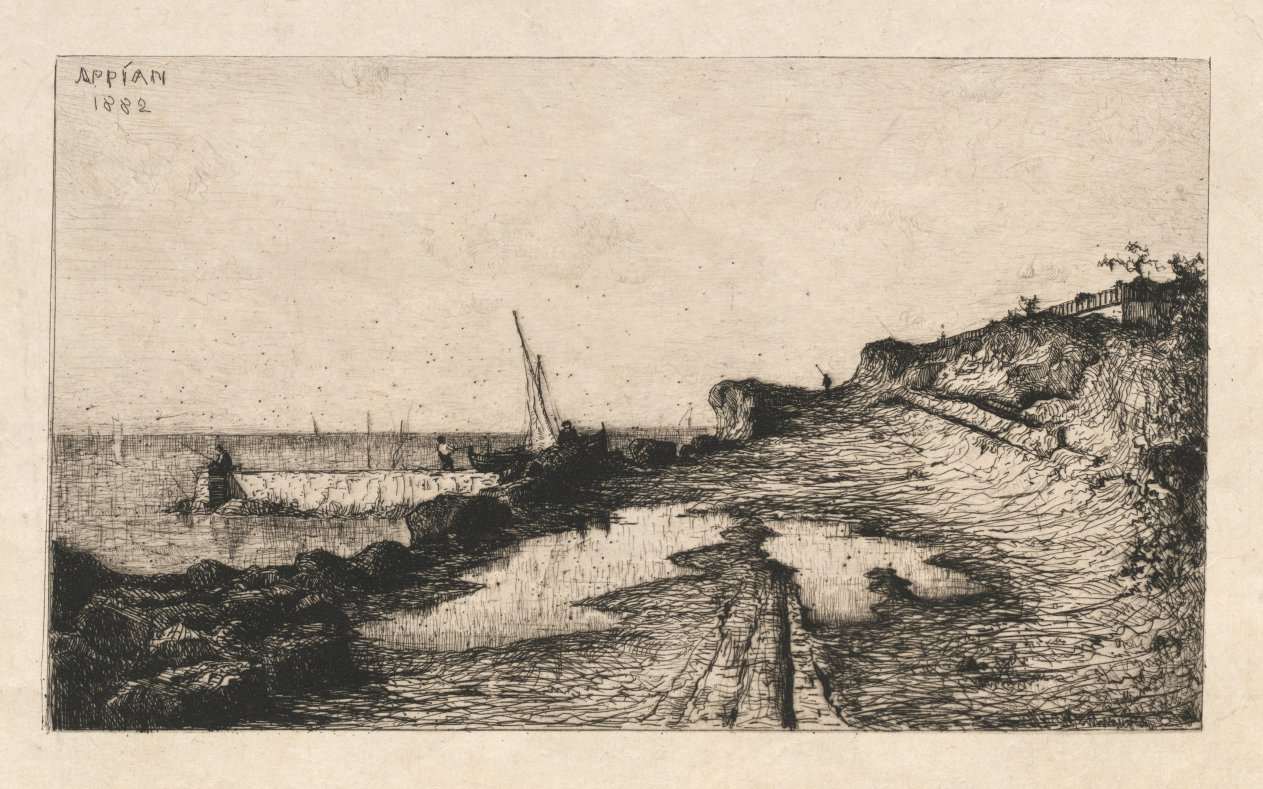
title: Environs of Carqueronne (Environs de Carqueronne)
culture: France, 19th century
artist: Adolphe Appian (French, 1818–1898)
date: 1882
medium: etching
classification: Print